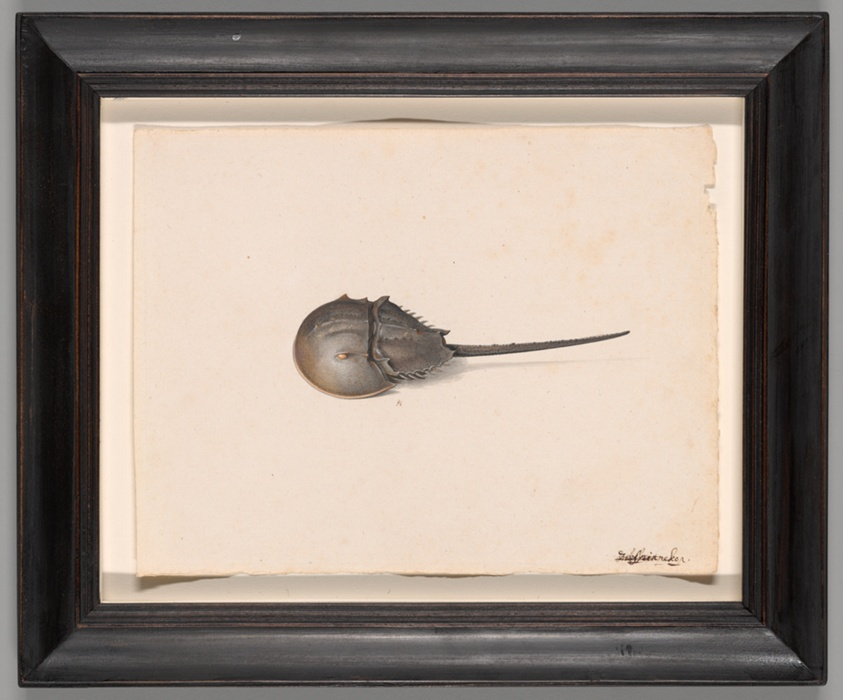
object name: Drawing and Watercolor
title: A Horseshoe Crab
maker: Pieter Holsteyn, the younger (Dutch, 1614–1687)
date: 1640/80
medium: Watercolor and opaque watercolor on cream laid paper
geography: Netherlands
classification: prints and drawing; paper; watercolor; drawings (visual works)